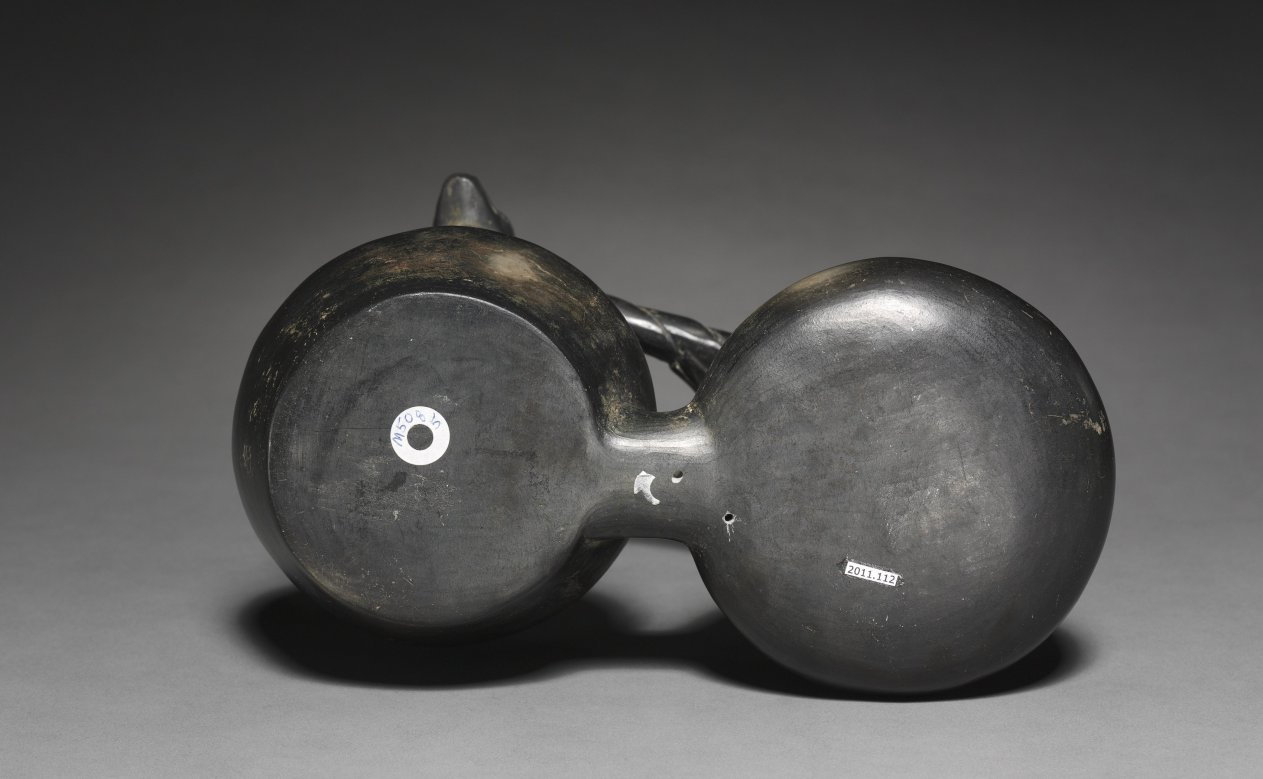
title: Double-chambered Vessel with Figures and Camelid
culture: Andes, Chimú-Inka, late 15th - mid 16th century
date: 1470–1532 (Thermoluminescence date, 1310–1610)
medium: ceramic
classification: Ceramic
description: Under the Chimú, ceramic seems to have been a less important artistic medium than for earlier north coast cultures. Accordingly, ceramics were mass-produced with molds and, rather than bearing painted scenes, often have an overall dark surface achieved by firing in a smoky atmosphere. The double-chambered vessel was made after the Inka conquered the Chimú in the 1460s.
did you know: When this vessel is filled with liquid and tilted back and forth, the camelid emits a whistling sound.